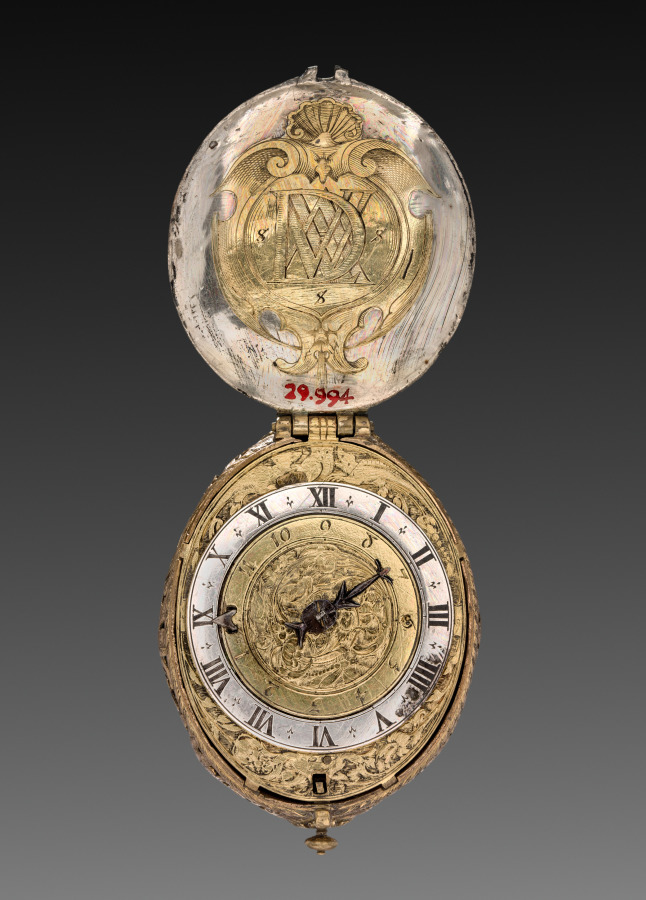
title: Engraved Egg Watch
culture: France, 16th century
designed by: Denis Martinot (French)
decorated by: attributed to Theodor de Bry (Flemish, 1528–1598)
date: 1590–1600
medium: silver, steel, and rock crystal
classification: Jewelry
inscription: inscribed: D. Martinot, Paris.